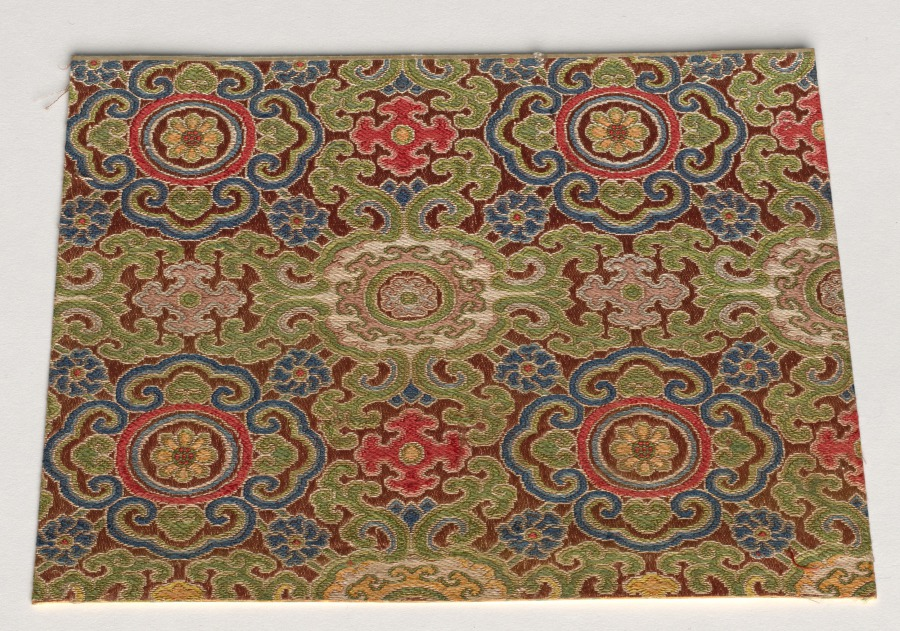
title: Fragment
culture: China, 19th century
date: 1800s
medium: silk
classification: Textile